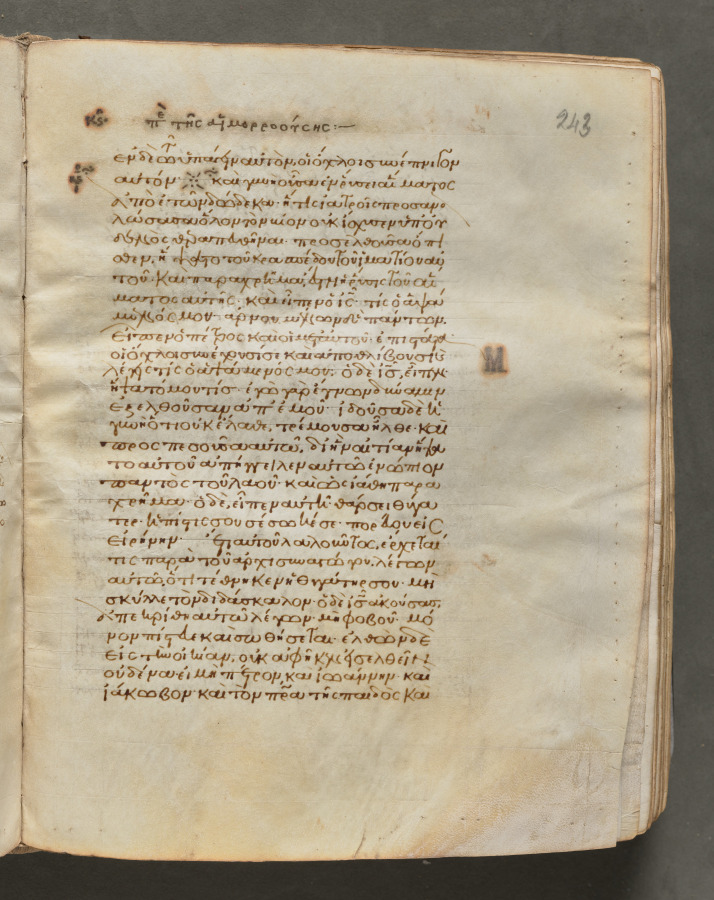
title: Text, folio 243 (recto), from a Gospel Book with Commentaries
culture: Byzantium, Constantinople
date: c. 1000–1100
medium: ink, tempera, and gold on vellum; leather binding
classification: Bound Volume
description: Each of the four gospels in this book opens on a page with brilliantly illuminated borders depicting the author of the text as well as birds—principally peacocks, symbols of the immortality of the soul—and fountains, representing the fountain of life and the salvation of the soul. This volume consists of 428 leaves with texts in Greek. Its level of sophistication suggests that it was probably written and decorated in a monastery in Constantinople.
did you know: Gospel books were carried in procession through Byzantine churches.